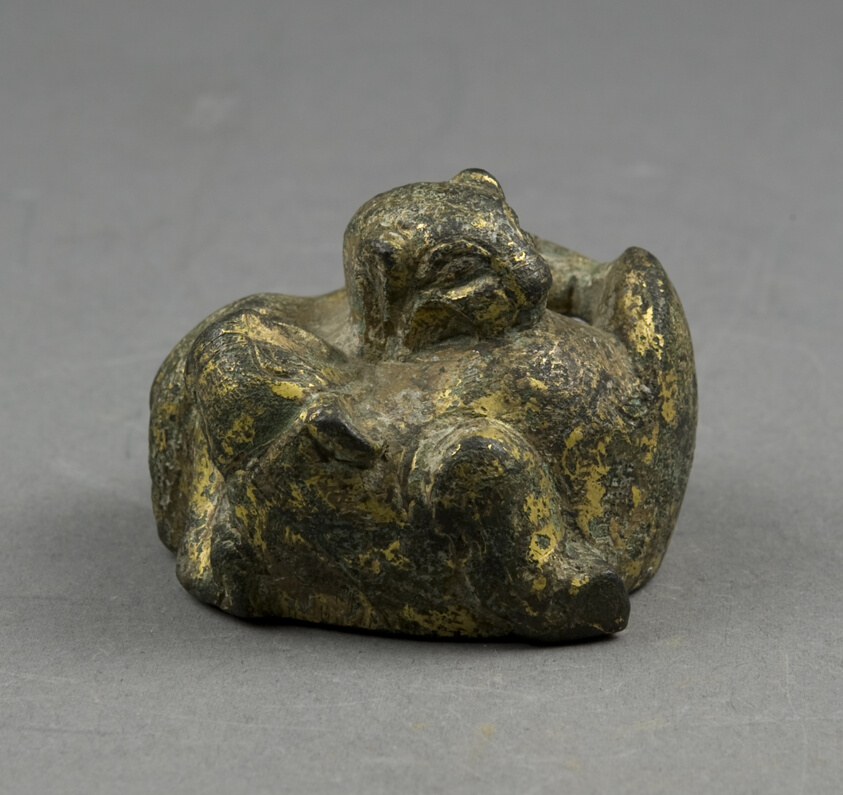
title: Sleeve weight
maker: China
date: Han dynasty (206 BCE–220 CE)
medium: Bronze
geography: China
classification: bronze; metal; ojime; asian art